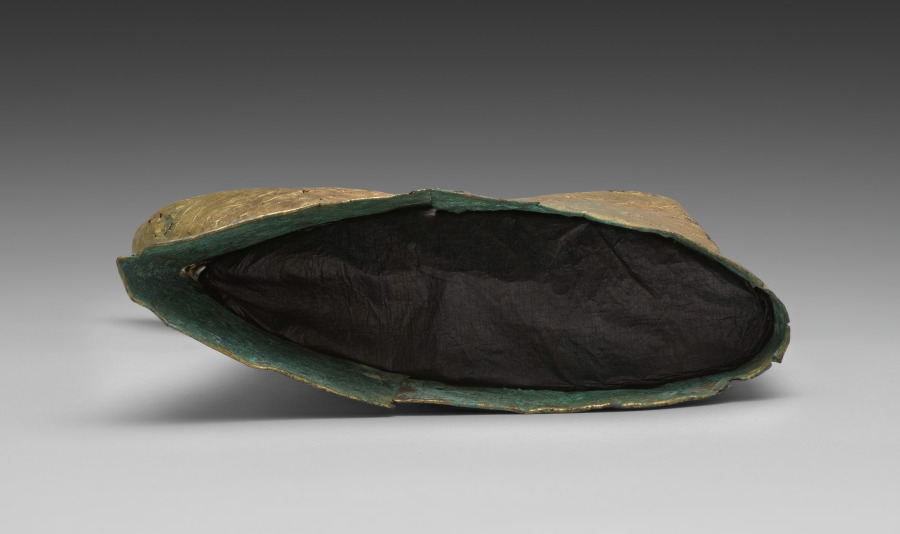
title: Gilt-bronze Boot, One of a Pair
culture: Northern China, Liao dynasty (907-1125)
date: 907–1125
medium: Gilt-bronze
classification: Metalwork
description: Bronze and silver-gilt boots, modeled after textile and leather boots, were found in Liao tombs. A pair of silver-gilt boots (dated 1018 or earlier) with phoenix motifs and cloud scrolls, were excavated from the tomb of Princess Chen and Xiao Shaoju in Inner Mongolia at Qinglongshan town in Naiman Banner; the couple’s faces were covered with gold masks. This gilt-bronze boot shows rising dragons chasing pearls and may have been made for a male tomb occupant.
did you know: The boot's dragon motif suggests that the wearer was a male princely member of the ruling family.